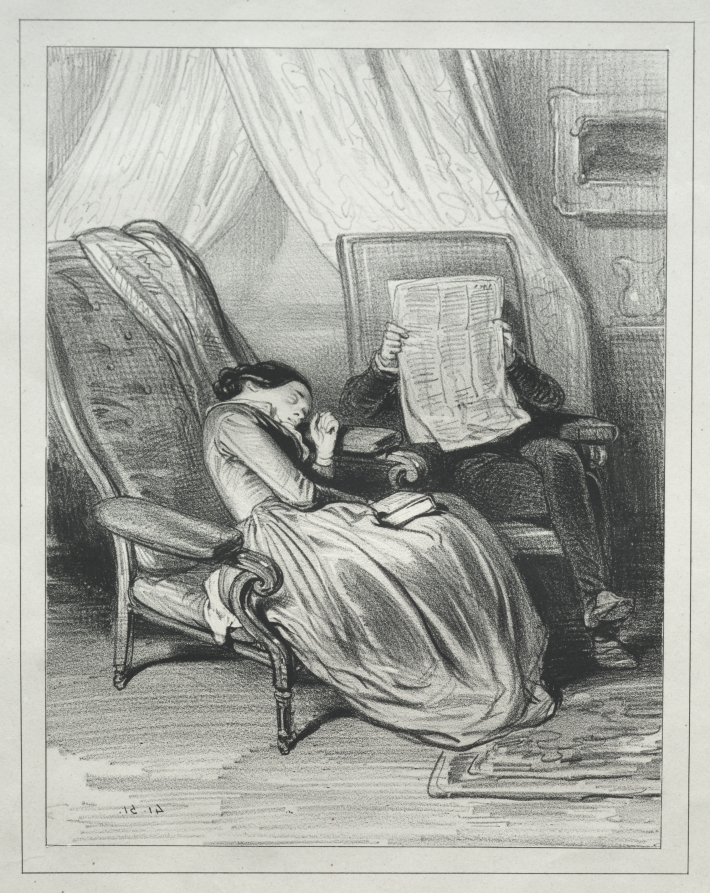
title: Les Martyrs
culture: France, 19th century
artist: Paul Gavarni (French, 1804–1866)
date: c. 1840–41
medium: lithograph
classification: Print